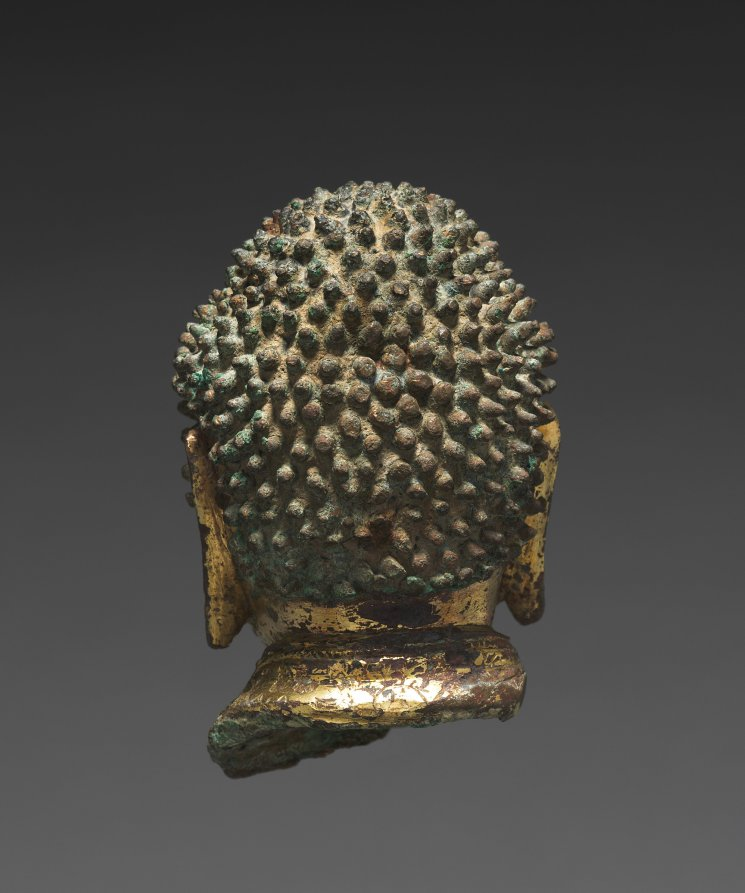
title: Head of Buddha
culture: Korea, Goryeo dynasty (918–1392)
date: 900s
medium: gilt bronze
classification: Sculpture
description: While large Buddhist statues were made mostly in stone during the Goryeo period (918–1392), small ones were made in gilt bronze, as a portable object of devotion by traveling Buddhist monks.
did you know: A gentle smile crossing the Buddha's face here is a sign of compassion.